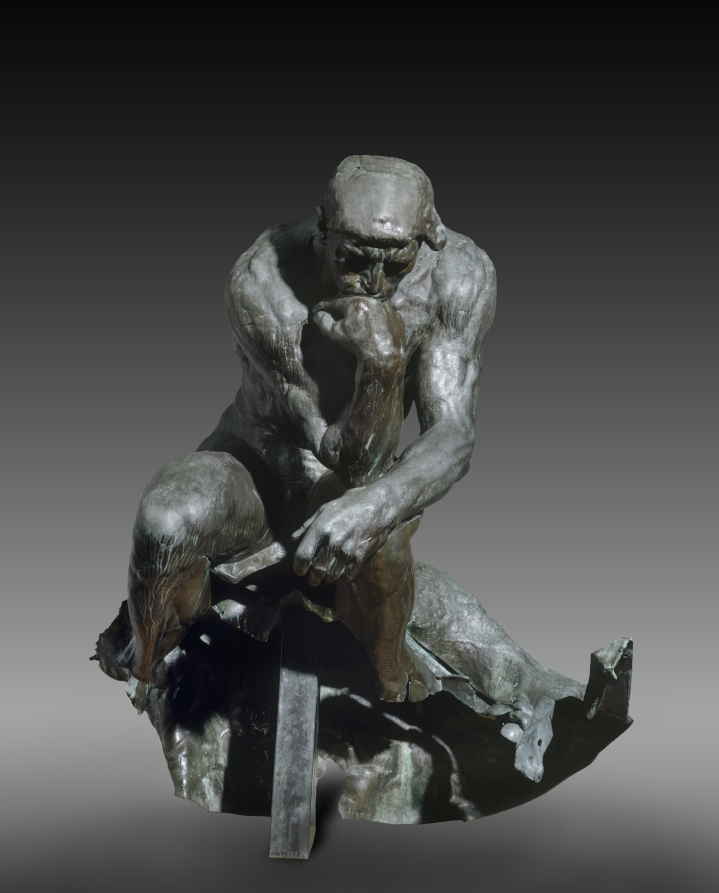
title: The Thinker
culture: France, 19th century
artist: Auguste Rodin (French, 1840–1917)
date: 1880–81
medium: bronze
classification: Sculpture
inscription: signed on base near sinister foot: "A. Rodin."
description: The Thinker was first developed as part of Rodin's The Gates of Hell, a sculptured doorway for a proposed museum of decorative arts in Paris. Intended to be part of a relief directly above the doors, the rugged figure was originally conceived as a generalized image of the Italian poet Dante Alighieri (1265–1321), who wrote the Divine Comedy.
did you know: This enlarged version of The Thinker is one of less than 10 cast during Rodin's lifetime.